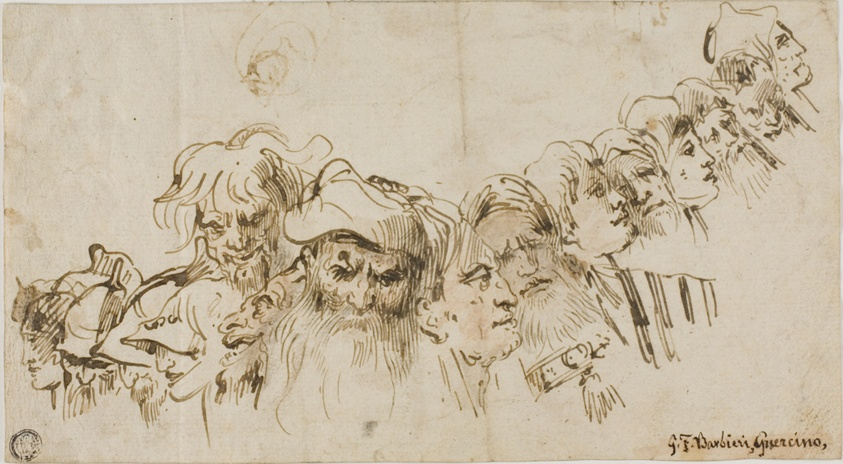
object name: Drawing and Watercolor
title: Sketches of Male Heads (recto); Queen and Page (verso)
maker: Possibly Giambattista Tiepolo (Italian, 1696-1770); or Giovanni Domenico Tiepolo (Italian, 1727-1804)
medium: Pen and brown ink with brush and brown wash (recto) and red chalk with brush and red chalk wash; pen and brown ink, with traces of black chalk (verso) on ivory laid paper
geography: Italy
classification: drawings (visual works); prints and drawing